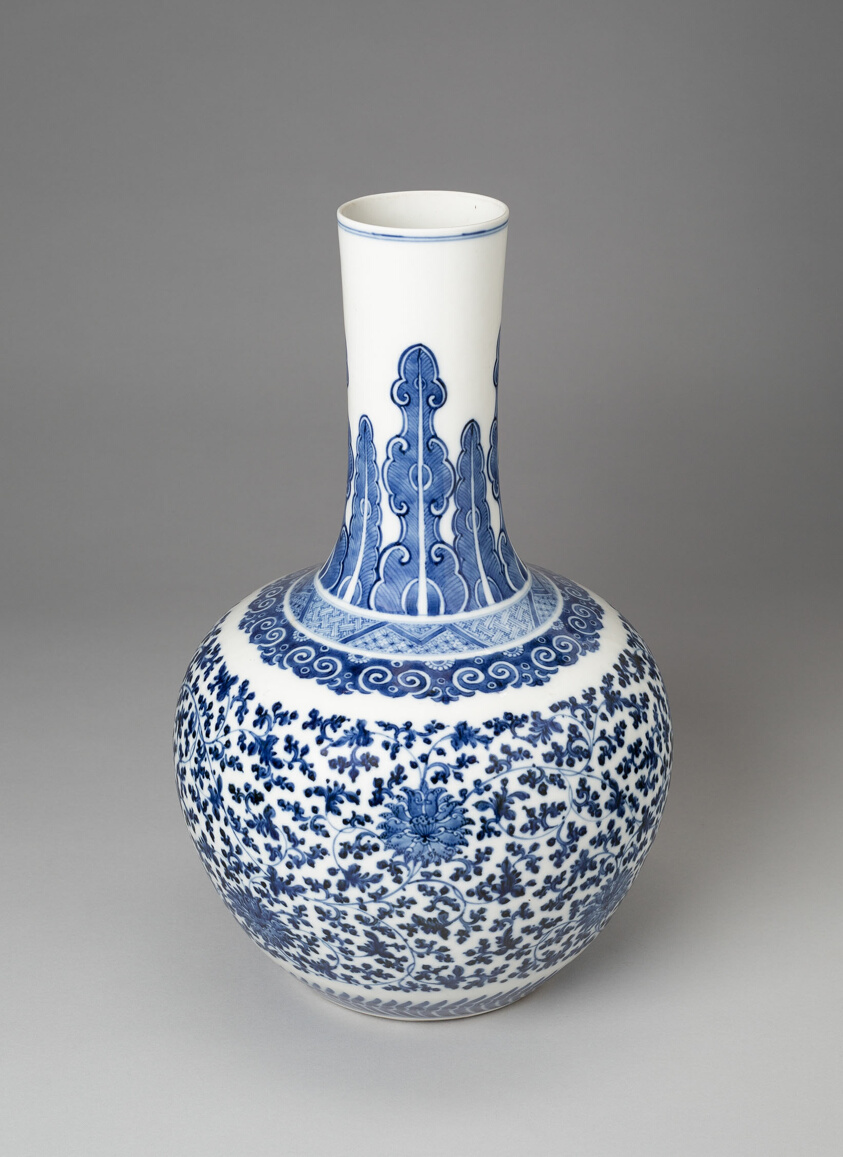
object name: Decorative Arts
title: Bulbous Vase with Stylized Vines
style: Chinese (culture or style)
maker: China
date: Qing dynasty (1644–1911), Yongzheng period (1723–35)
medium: Porcelain painted in underglaze blue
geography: China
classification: vase; porcelain; vessel; asian art; ceramics; decorative arts